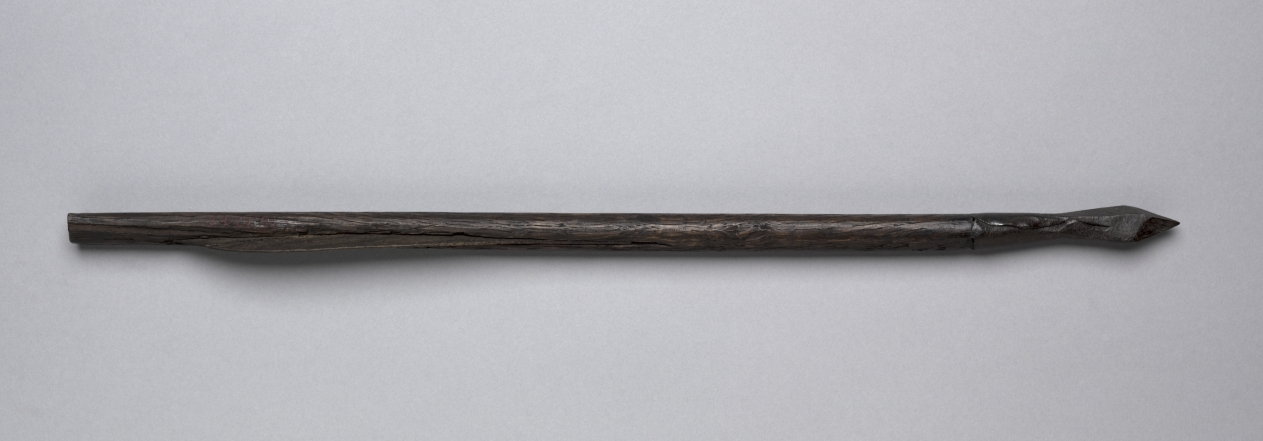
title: Crossbow Bolt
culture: Germany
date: 1500s-1600s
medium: wood, leather, steel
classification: Arms and Armor